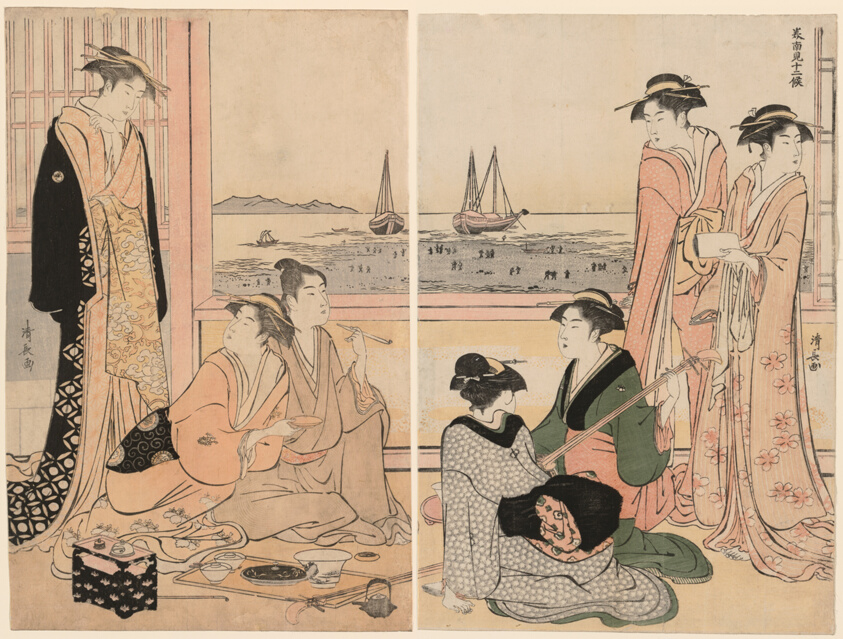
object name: Print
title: The Fourth Month, from the series "Twelve Months in the South (Minami juni ko)"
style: Japanese (culture or style)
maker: Torii Kiyonaga (Japanese, 1752-1815)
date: c. 1784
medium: Color woodblock prints; oban diptych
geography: Japan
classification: woodblock print; print; asian art